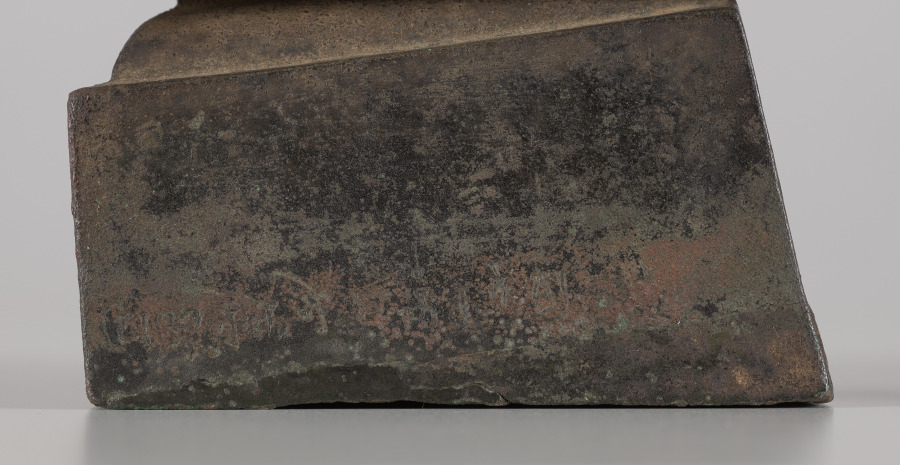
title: Standing Buddha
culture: Northern India, Uttar Pradesh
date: 591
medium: bronze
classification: Sculpture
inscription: 1. ṹ deyadharmmoyaṃ laḍitagrāme yaṃgvalvihāre śā[kya] bhikṣuṇyā 2. pariśuddhamatyā yadattra puṇyaṃ tadbhavatu sarvvasatvānā- 3. manuttarasarvva jñānāvāptaye/ / saṃvat 4a. 500 10 3/ / caityakūta jinabandhuvihārapūrvva-bhuddeśe 4b. piṇḍakena bhojanaṃ karttavya*/ / *Mistake for karttavyam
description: This bronze Buddha is exceptional, because it carries an inscription on its base that dates its manufacture to the year 591. According to the inscription, the sculpture was dedicated by a nun who was from a village in Nepal, but she probably commissioned it at a workshop in northern India. The Buddha's robe on this image has been left plain, without pleat lines to obscure the beauty of the contours of the body. Only the rippling scalloped clusters of the garment’s hem lend some sense of energy and subtle ornament to the composition.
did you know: Around the time when this sculpture was made, portable bronzes began to replace relics as the principal sacred commodity circulating in the Buddhist world.